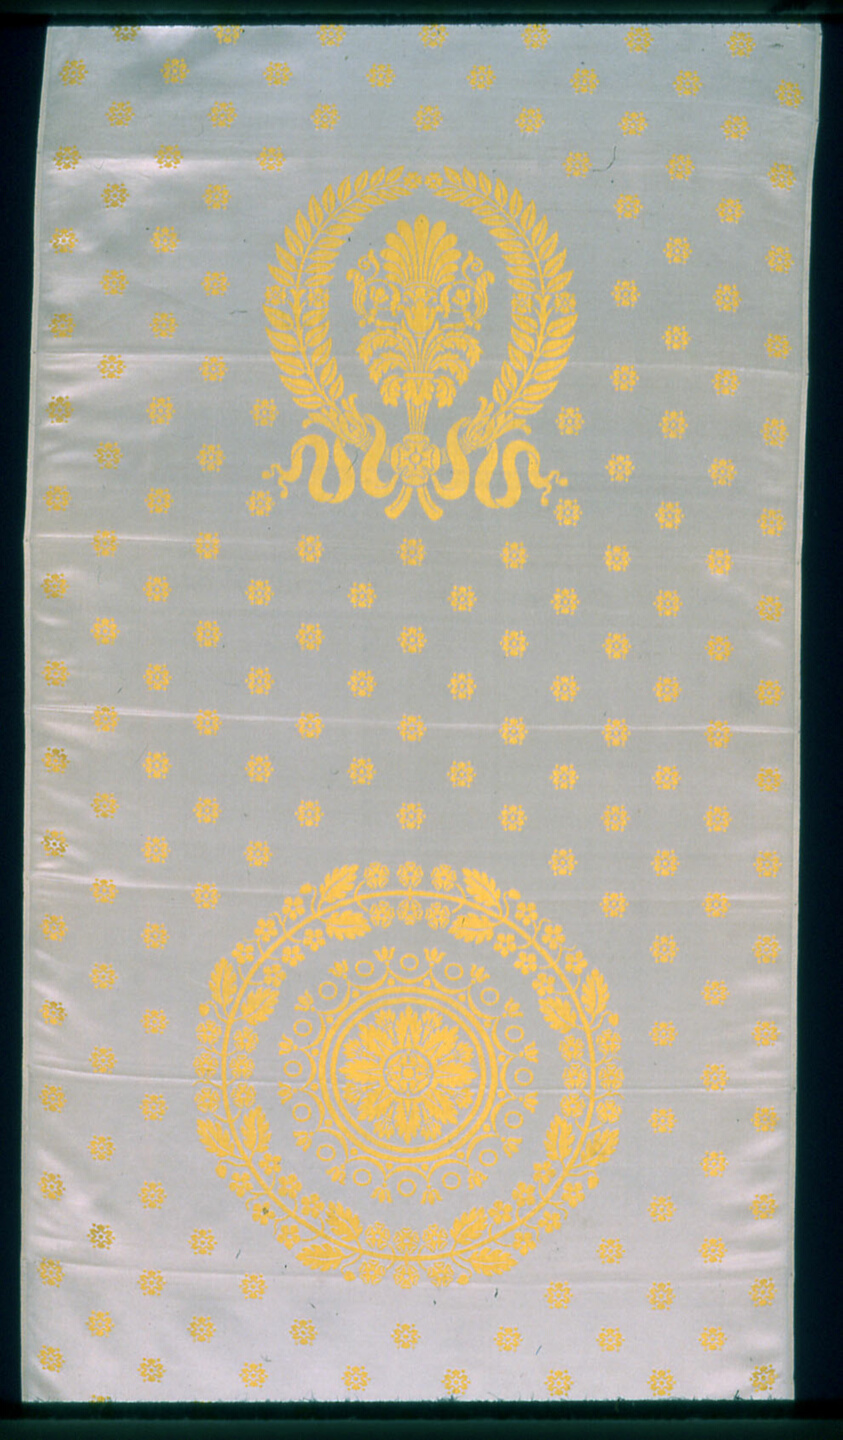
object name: Textile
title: Chair Cover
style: empire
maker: France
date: 1800/25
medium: Silk, warp-float faced 7:1 satin weave with plain interlacings of secondary binding warps and supplementary patterning wefts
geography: France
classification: textile; weaving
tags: medallions, flowers